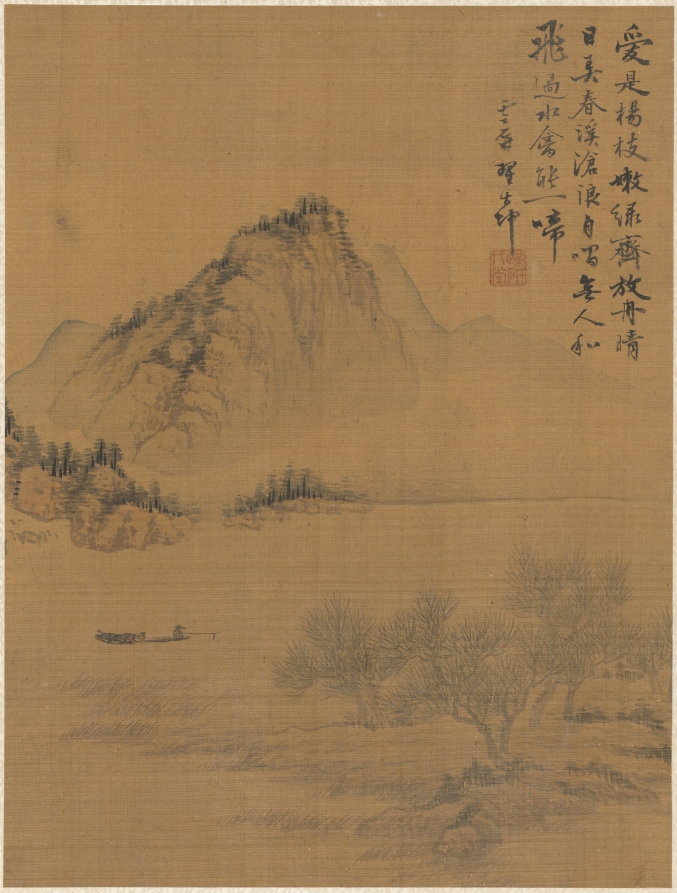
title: Landscape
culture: China, Qing dynasty (1644-1911)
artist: Zhai Dakun (Chinese, d. 1804)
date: 1775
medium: album leaf; ink and color on silk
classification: Painting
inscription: "Drifting in a Boat" I love these willow branches putting forth their delicate green leaves, Drifting in a boat, I pass the spring streams. Over Canglang I shout out, but no one responds, Only the water-birds flying by are able to give a single cry. Yunping Zhai Dakun Seal: 1) s/r "Quiyan caotang" (Thatched hall at Guiyan")